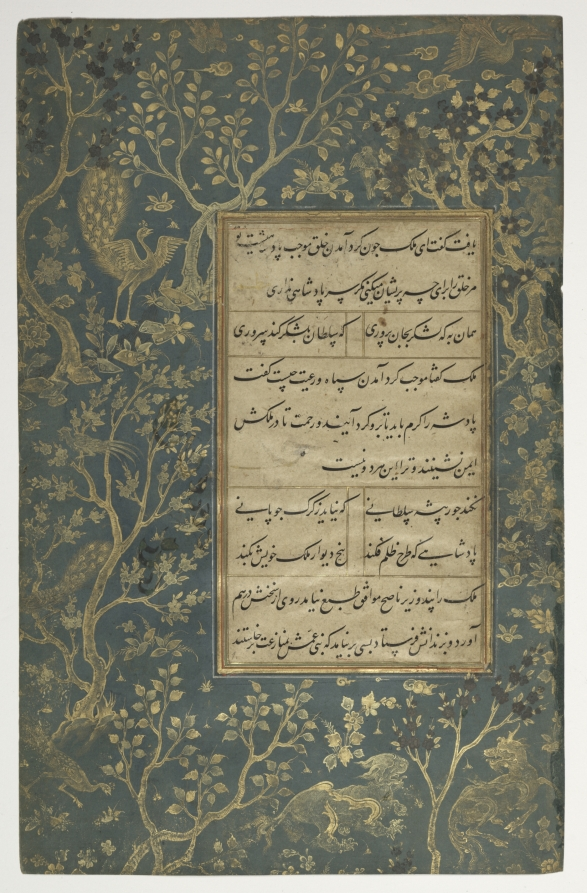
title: Illuminated Folio (recto) from a Gulistan (Rose Garden) of Sa'di (c. 1213–1291)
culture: Afghanistan, Herat, Timurid period (1370–1501)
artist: Sultan 'Ali al-Mashadi (Iranian, 1430–1520)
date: c. 1475–1500; border: c. 1550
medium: Gum tempera, ink, gold, and silver on paper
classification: Manuscript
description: In the border surrounding the Persian poetical text, deer and a lion coexist peacefully in a forest. This imagery may reference the rule of a righteous king. The text is from the Gulistan, one of the most celebrated works of Persian literature, completed around 1258. Gulistan means “Rose Garden” in Persian; just as a rose garden is a collection of flowers, the contents are a collection of anecdotes. This page is from the section “On the Conduct of Kings.”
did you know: The exquisite border was painted in gold and silver that has tarnished over time.